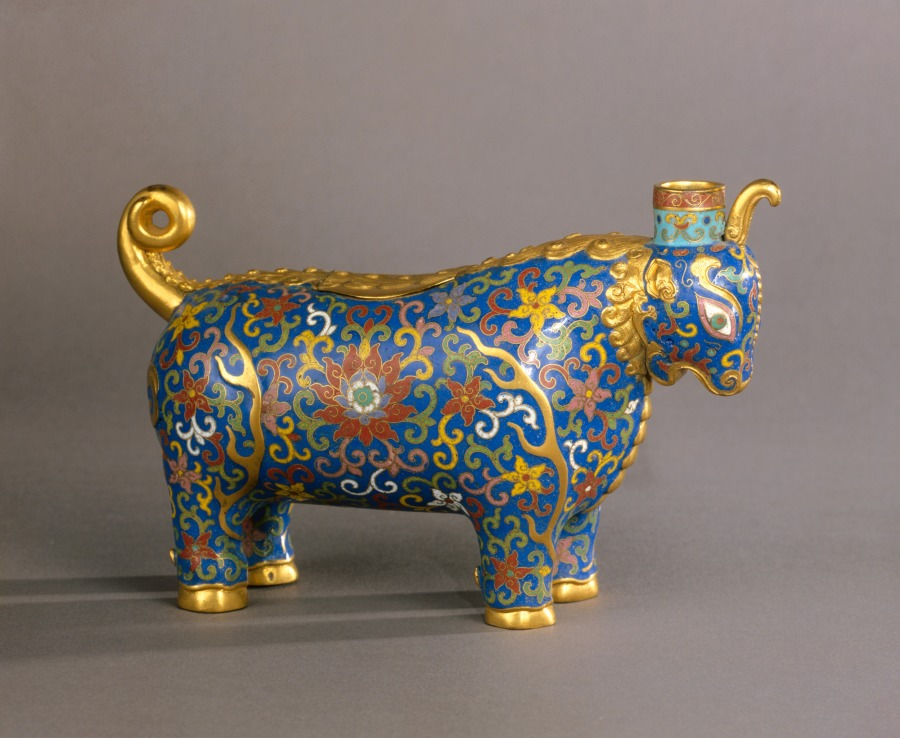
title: Container in the Form of a Unicorn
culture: China, Qing dynasty (1644-1911), Qianlong mark and reign (1736-95)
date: 1736–95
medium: cloisonné enamel and gilt copper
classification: Enamel